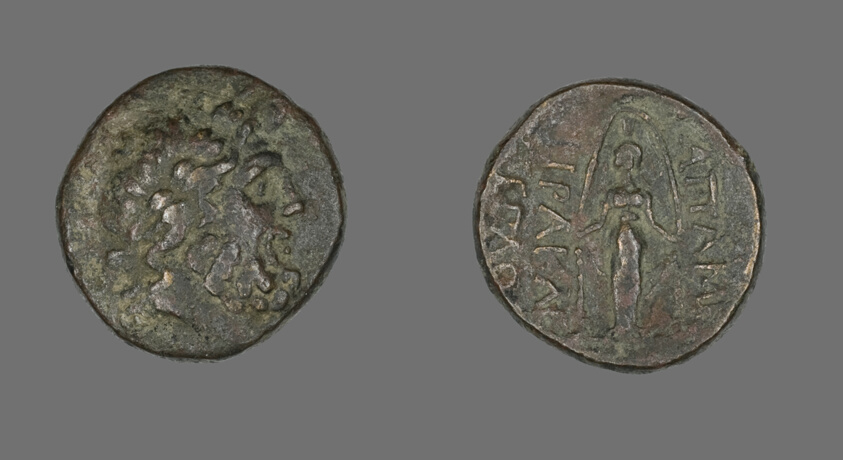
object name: Coin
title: Coin Depicting the God Zeus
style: greek, ancient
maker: Greek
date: 133-48 BCE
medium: Bronze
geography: Ancient Greece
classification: coin; ancient art